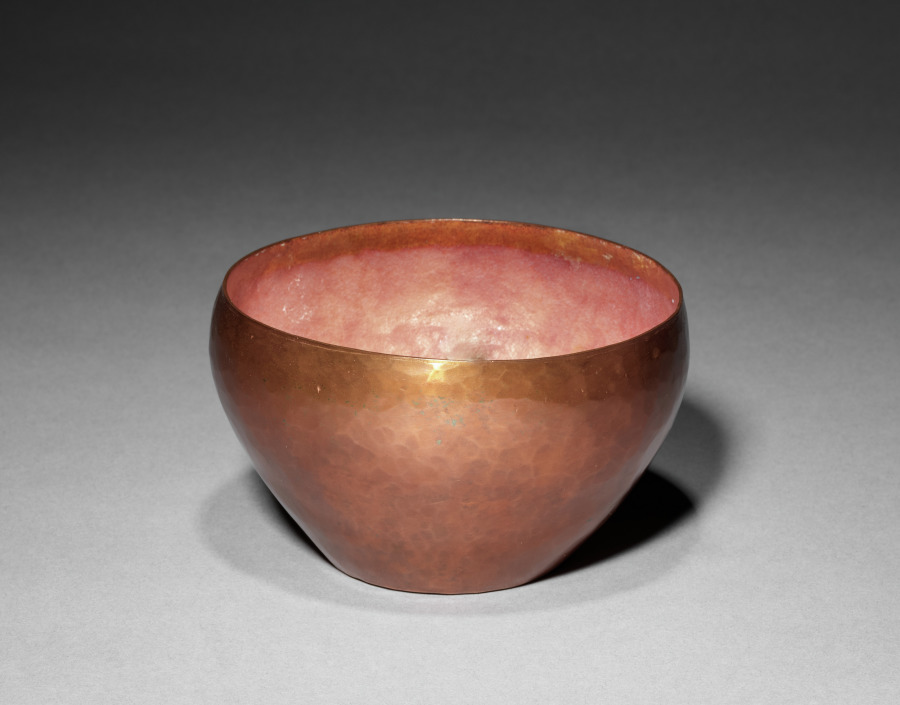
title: Bowl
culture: America, Ohio, Cleveland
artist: Kenneth F. Bates (American, Cleveland, 1904–1994)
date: 1927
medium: copper and enamel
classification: Enamel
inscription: incised on bottom: "Kenneth F. Bates 1927."